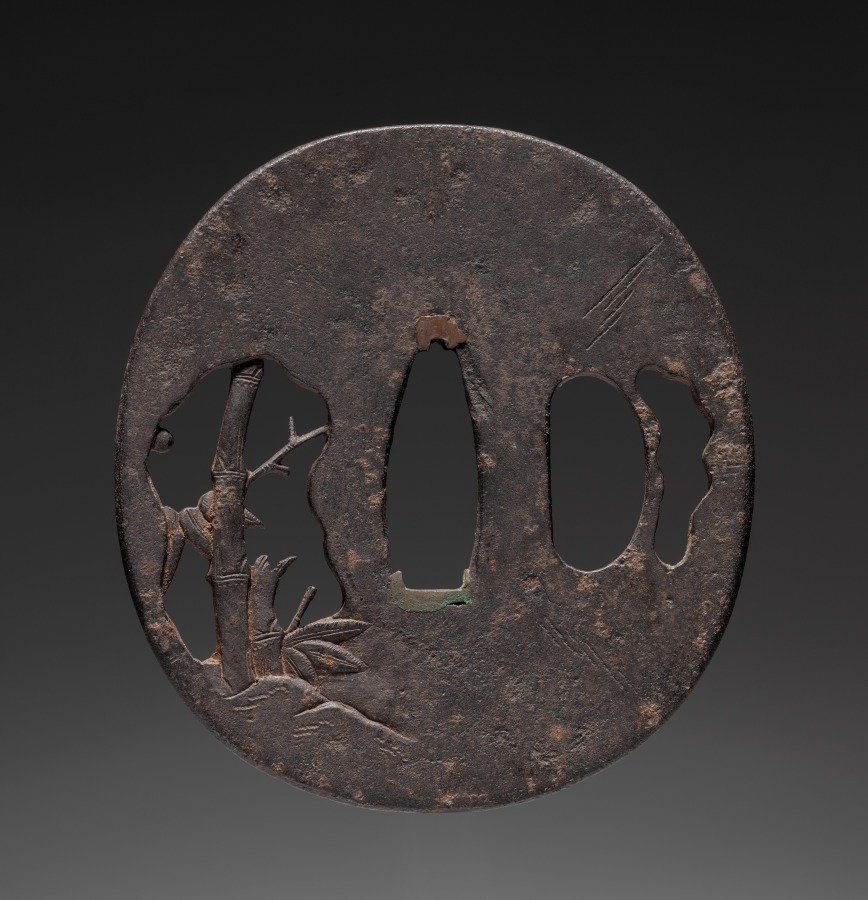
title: Sword Guard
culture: Japan, Edo period (1615–1868)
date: 1700–1768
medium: iron (Mito type)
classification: Arms and Armor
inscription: signed "Tsuju (Michinaga), residing at Mito."